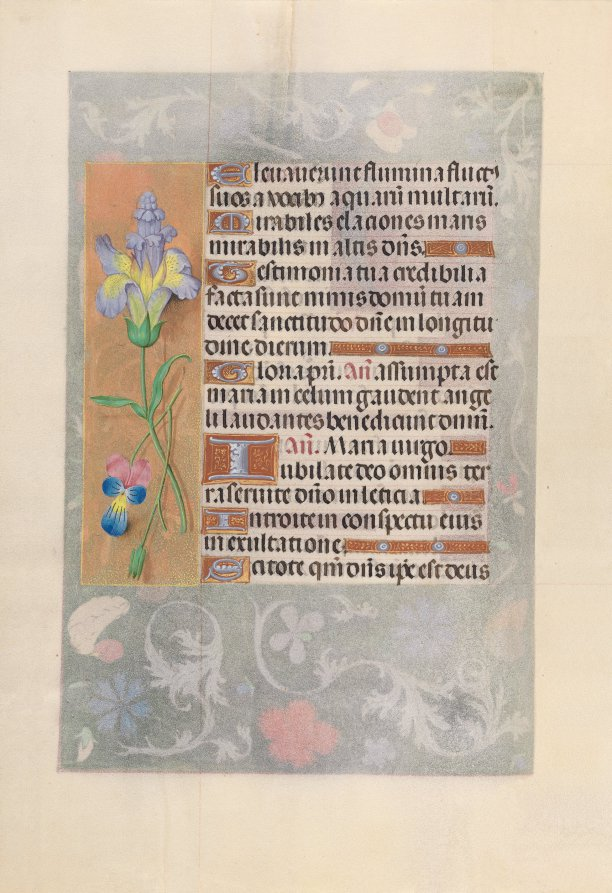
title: Hours of Queen Isabella the Catholic, Queen of Spain: Fol. 116v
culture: Flanders, Ghent and Bruges, late 15th century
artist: Master of the First Prayerbook of Maximillian (Flemish, c. 1444–1519)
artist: and Associates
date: c. 1500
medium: ink, tempera, and gold on vellum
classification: Bound Volume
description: This manuscript was illuminated by a circle of at least five highly organized manuscript painters active in the Flemish cities of Ghent and Bruges. The principal illuminator was Alexander Bening, who painted the majority of the book's miniatures. Manuscripts produced by this circle of artists are renowned for the decoration of their borders, which typically feature a rich variety of realistically-painted flowers, birds, and butterflies. This prayer book, called a book of hours, was intended not for a cleric, but for the private devotions of a lay person-in this case, Isabella the Catholic, Queen of Spain (1451-1504). Isabella's coat of arms embellishes the book's frontispiece. It is unlikely that the book was commissioned by the Queen herself; rather, she probably received it as a diplomatic gift from someone courting her patronage, perhaps Cardinal Francisco Jimenez de Cisneros. A Franciscan friar, Jimenez was dependent upon Isabella for his advancement, first to the post of Queen's confessor in 1492, and then to Archbishop of Toledo in 1495.